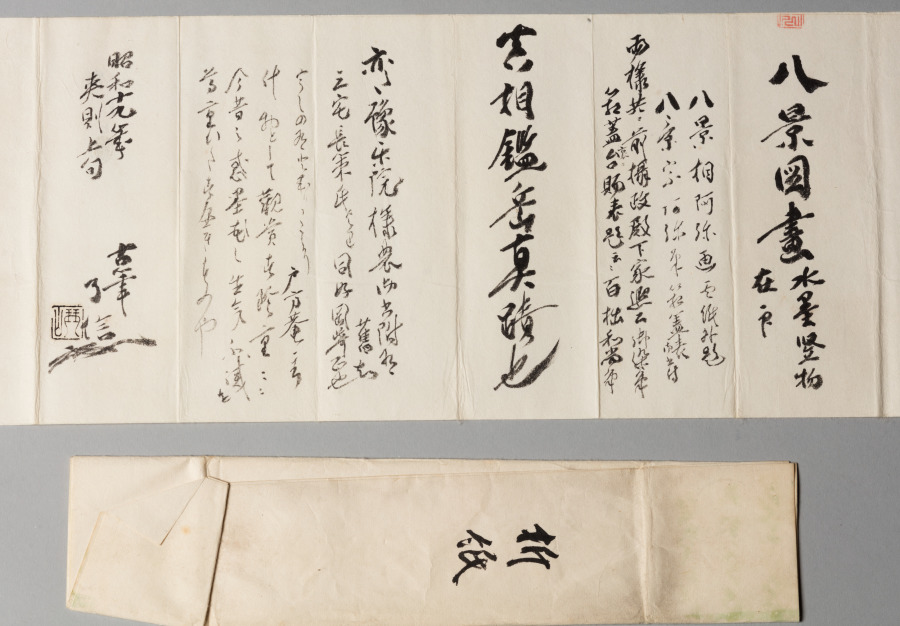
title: Landscape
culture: Japan, Edo period (1615–1868)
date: early 1600s to mid-1800s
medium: hanging scroll; ink on paper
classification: Painting